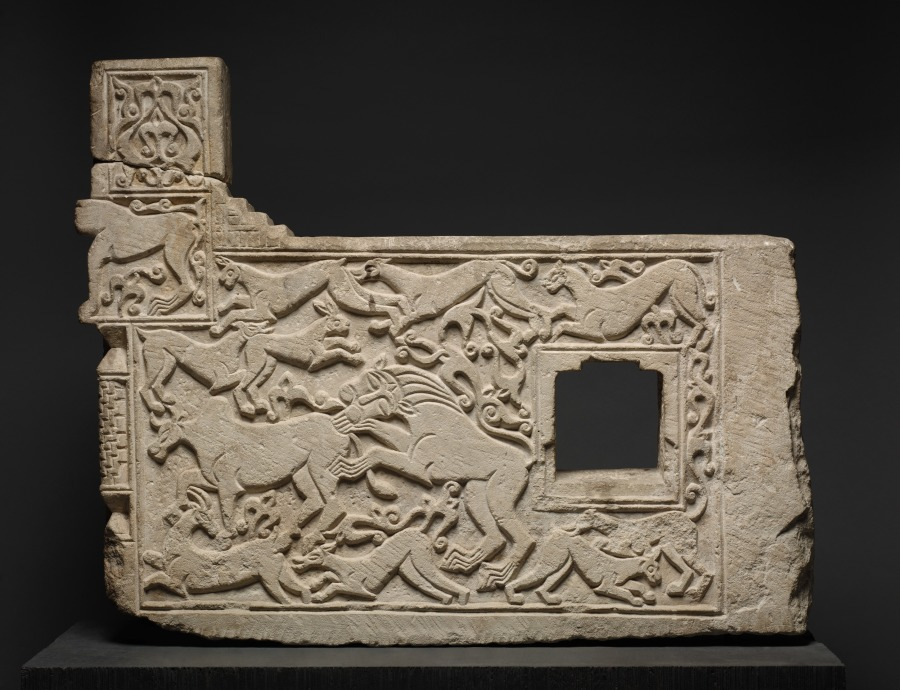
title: Balustrade Fragment with Animals from the residence of Hajji Hasan ibn Ibrahim ibn Muhammad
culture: Iran, Hamadan, Ilkhanid period (1256–1353)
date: 1303–4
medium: limestone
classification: Sculpture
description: This architectural relief shows a lion attacking a bull surrounded by other predators pursuing their prey, with scrolling vegetal motifs filling the spaces between. Scenes of powerful predators in the act of hunting and capturing other animals echo the royal imagery of pre-Islamic Iran. This piece was part of a balustrade in a private home; the owner and construction date are known from another fragment from the same building. The building was embellished when the Mongols controlled Iran, and the relief shows a continuity in style from carvings made during the preceding Turkic Seljuk period (1037–1194). Under Turkic and Mongol rule in Iran, Islamic injunctions against making figural imagery were loosened.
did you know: This balustrade and two others, now in the Metropolitan Museum of Art in New York and the Louvre in Paris, are from a building probably in the city of Hamadan, Iran.